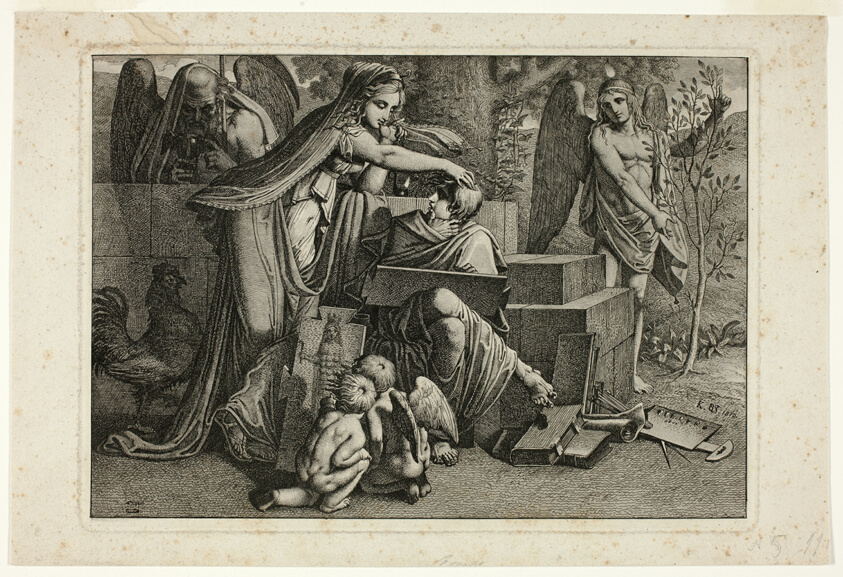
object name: Print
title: Allegory of Art: A Youth Inspired by the Spirit of Art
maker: Carl Russ (Austrian, 1779-1843)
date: 1810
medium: Etching and aquatint in black on tan wove paper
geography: Austria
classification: etching; print; prints and drawing